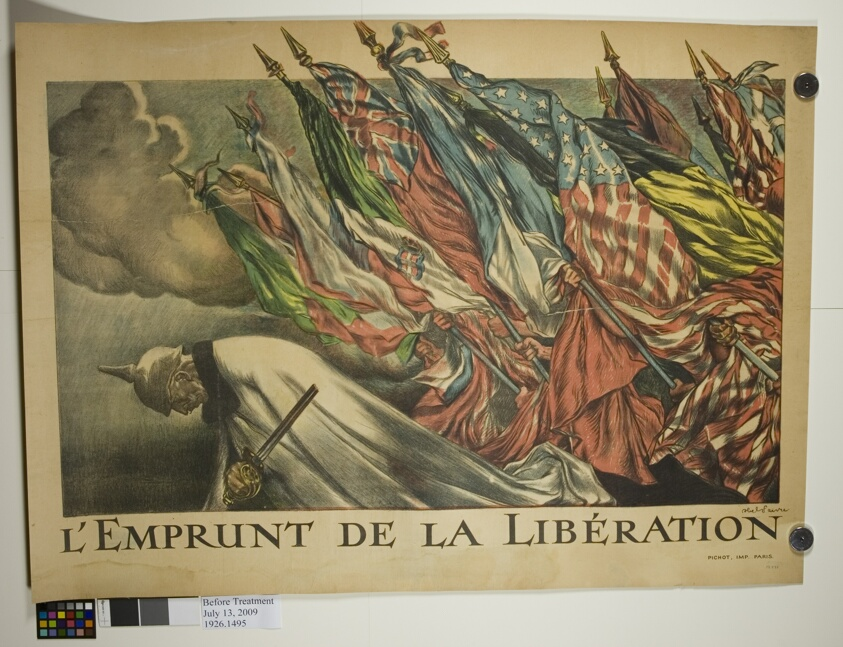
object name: Print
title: The Liberation Loan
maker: Abel Faivre (French, 1867-1945); printed by Devambez Imprimerie (French, 20th century)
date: 1918–20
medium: Color lithograph on cream wove paper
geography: France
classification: poster; print; prints and drawing